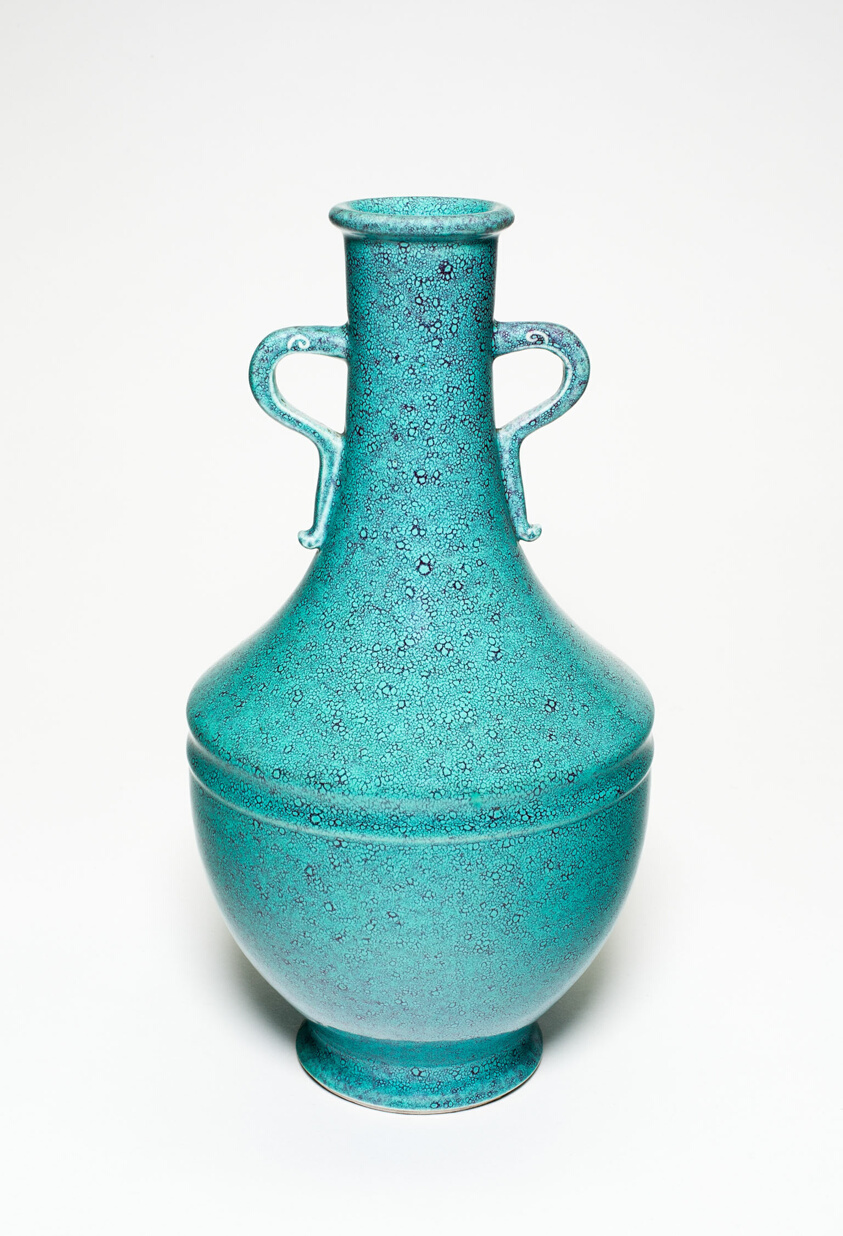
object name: Vessel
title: Baluster-Shaped Vase with Loop Handles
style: Chinese (culture or style)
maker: China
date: Qing dynasty (1644–1911), Qianlong reign mark and period (1736–1795)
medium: Porcelain with robin’s egg blue glaze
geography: China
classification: vase; vessel; porcelain; asian art; ceramics